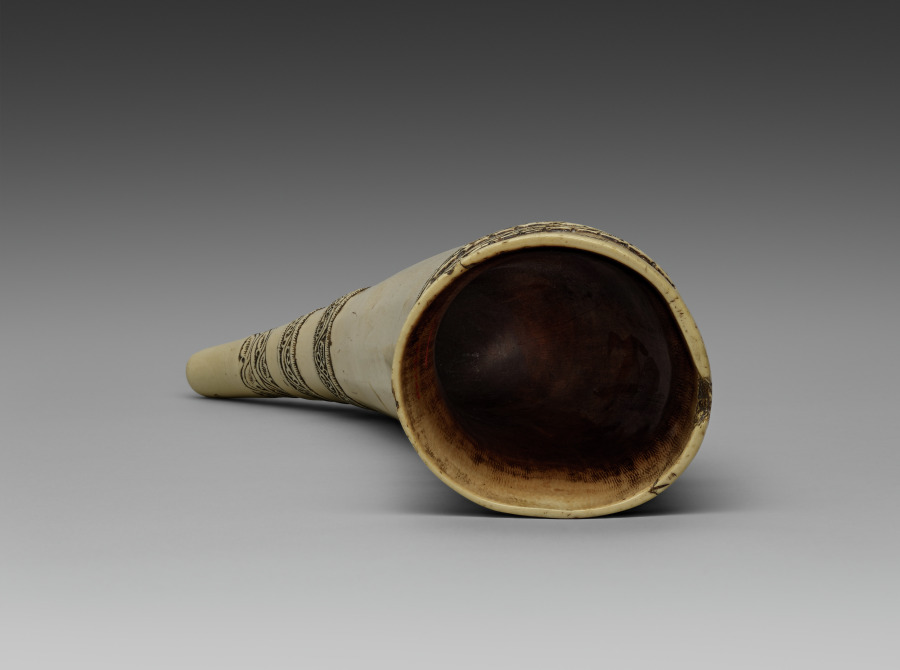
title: The So-called Horn of Saint Blaise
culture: South Italy or Sicily, 12th century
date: 1100–1200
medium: ivory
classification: Ivory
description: This oliphant--a carved elephant tusk in the shape of a hunting horn--was likely carved in an Arab ivory workshop in South Italy or Sicily. It is masterfully shaped, with a series of six carved bands, the outer ring depicting scenes from a hunt. The earliest surviving inventory of the church of Saint Blaise from 1482-85 lists an oliphant decorated with silver rings and precious stones and known as the "Horn of Saint Blaise." By the 17th century, Saint Blaise was reputed to have used this very horn to summon the faithful to worship.